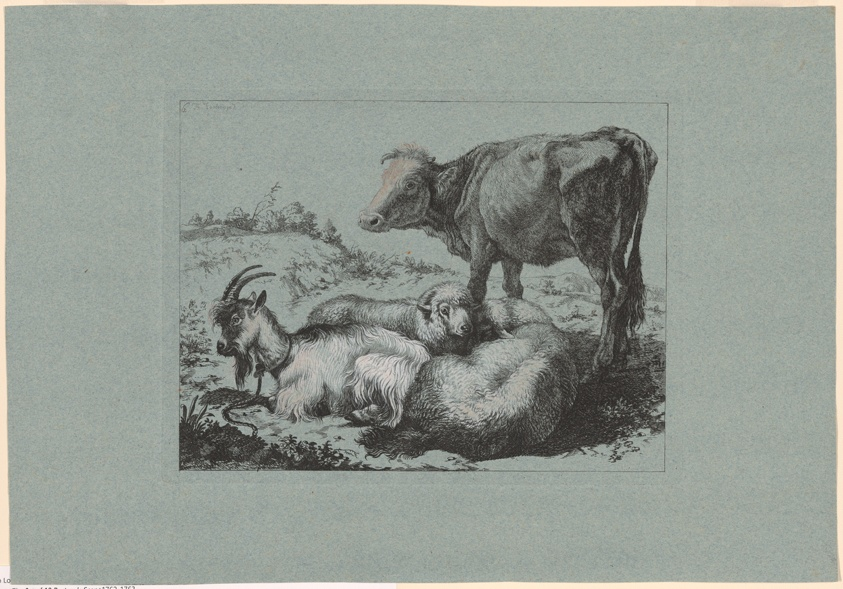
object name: Print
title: Plate 6, from The Set of 12 Pastorals Scenes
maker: Francesco Londonio (Italian, 1723-1783)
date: 1762-63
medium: Etching in black, with white opaque watercolor on blue wove paper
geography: Italy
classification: etching; paper; print; prints and drawing